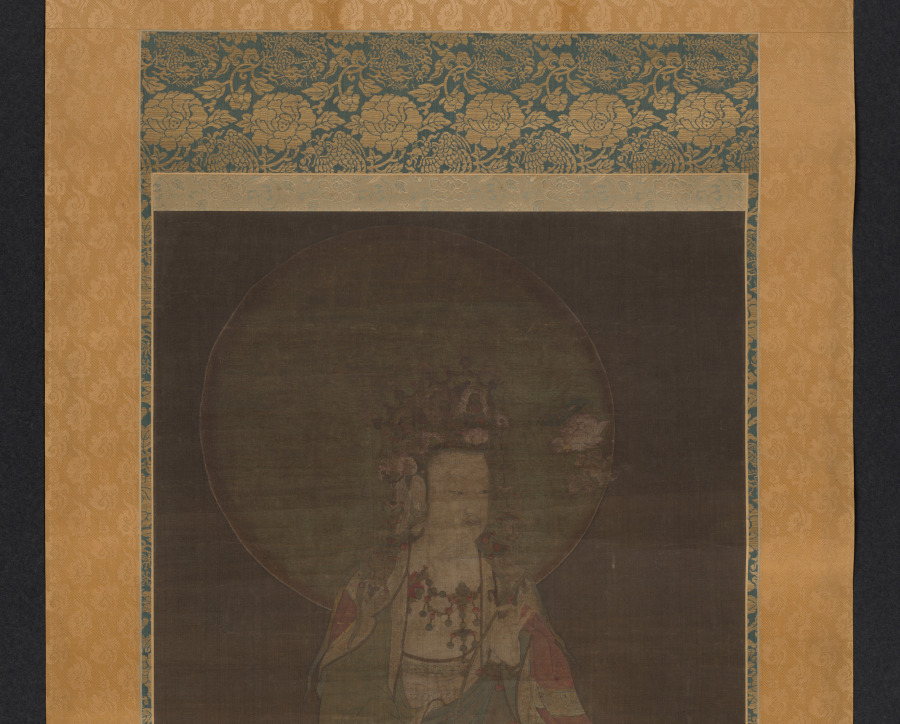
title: Samantabhadra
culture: China, Southern Song dynasty (1127-1279)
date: 1100s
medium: hanging scroll; ink and color on silk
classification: Painting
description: In the last chapter of the Lotus Sutra, one of the principal Buddhist texts, the great Bodhisattva Samantabhadra is described advancing to earth, riding on a six-tusked elephant, and proclaiming himself protector of the faithful. More frequently, he is shown with Bodhisattva Manjusri as the attendants of Shakyamuni (the historical Buddha). This scroll is probably the left panel in a triptych (group of three paintings) portraying these deities.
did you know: Samantabhadra holds a lotus with a sutra on top of the blossom.